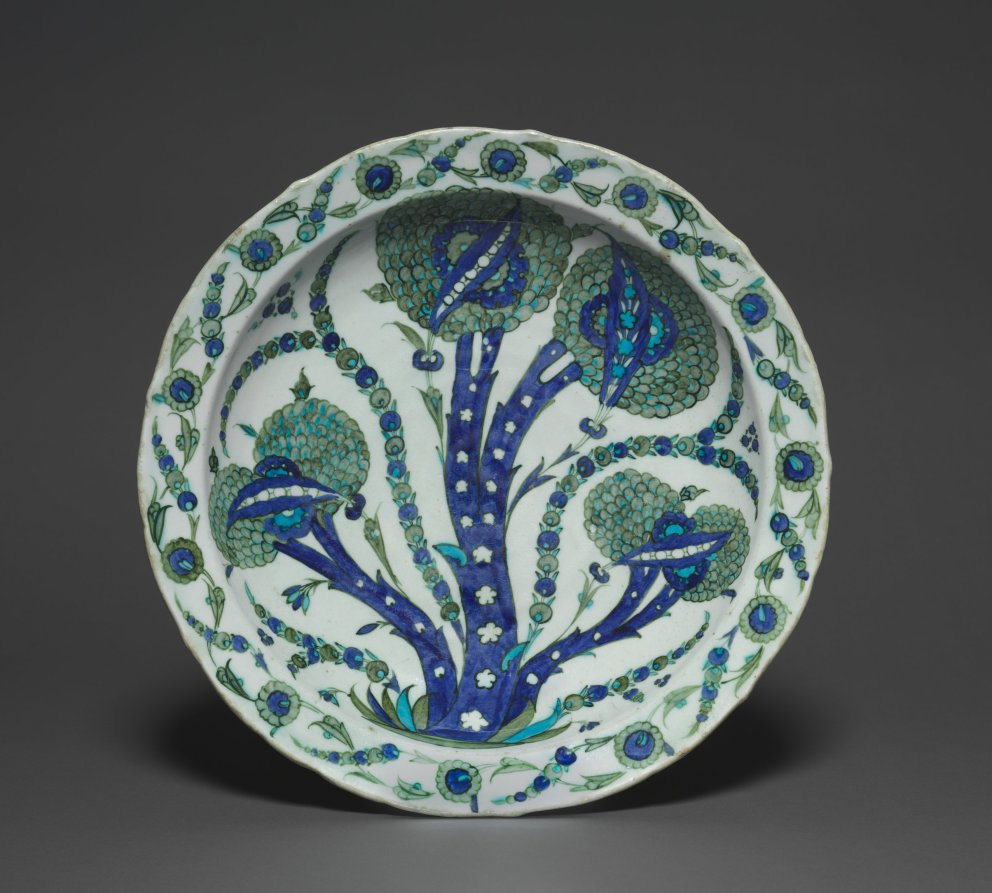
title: Large Dish with Artichokes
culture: Turkey, Iznik, Ottoman period (1299–1922)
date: c. 1535–40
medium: fritware with underglaze-painted design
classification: Ceramic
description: Ceramic vessels and tiles produced in Iznik, Turkey, for the Ottoman court in Istanbul represented the finest Islamic ceramics. Floral and vegetal motifs are a hallmark of Iznik pottery. The center of this dish is covered in a dynamic artichoke motif interwoven with rosettes and serrated saz leaves. The artichoke design was likely inspired by luxury Italian textiles imported into the Ottoman court. The dish represents a high point of Ottoman art during the reign of Sultan Suleyman the Magnificent (1520–66) in which European, Persian, Chinese, and Egyptian influences contributed to a distinct artistic language.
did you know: The artichoke is actually the bud of a thistle—a flower.